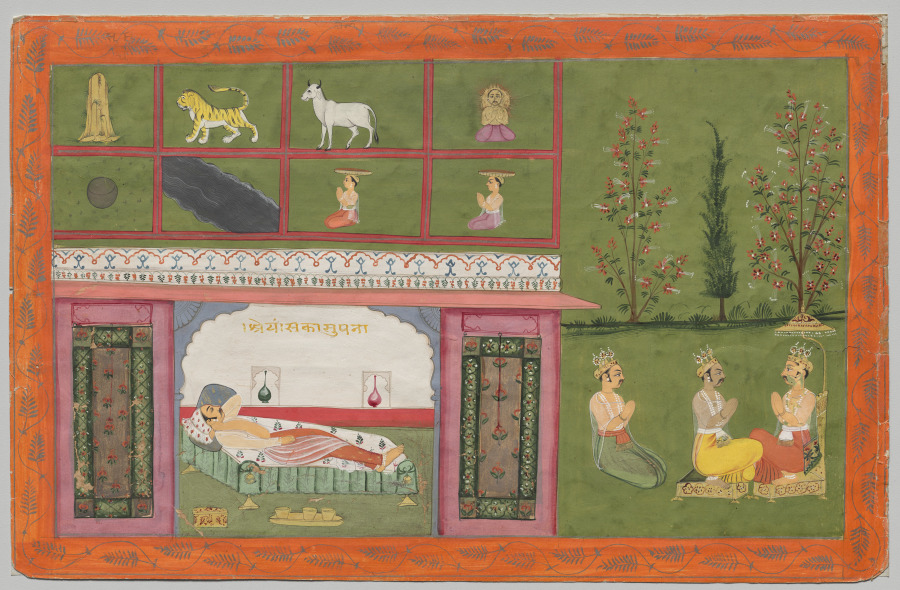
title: Prince Shreyamsa dreams of the coming of Rishabha, from a Panchakalyanaka (Five Auspicious Events)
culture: Northwestern India, Rajasthan, Rajput Kingdom of Amber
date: 1670–80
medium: Gum tempera, ink, silver, and gold on paper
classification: Painting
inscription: [[recto, devanagari inscription over the sleeping prince]] śreyaṁsakāsupanā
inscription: [[verso, upper left margin]] 25.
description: Dreams foretell important events in Indian literature. In this painting a prince lies half asleep and experiences eight visions, pictured above the reclining figure. At the right, the prince on the throne with the royal umbrella seeks help interpreting the dreams. They predicted the coming of Rishabha, the first Jina, who has been fasting for a full year. The prince then became the first person in the world to give proper alms, or pious offerings, to a Jina. This painting is from a group that is recognized as the first Jain manuscript made in the form of a pictorial series, rather than a handwritten manuscript.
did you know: This painting is from the earliest known Jain series made in a Mughal-inspired style.